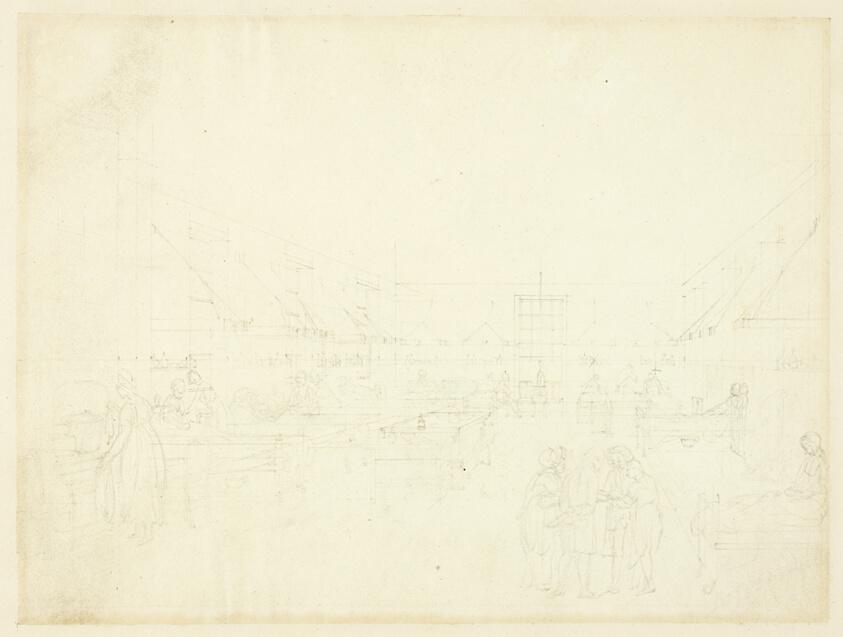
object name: Drawing and Watercolor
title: Study for Hospital, Middlesex, from Microcosm of London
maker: Augustus Charles Pugin (English, born France, 1762-1832); Thomas Rowlandson (English, 1756-1827)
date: c. 1808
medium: Graphite on cream wove paper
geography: England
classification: graphite; drawings (visual works); prints and drawing